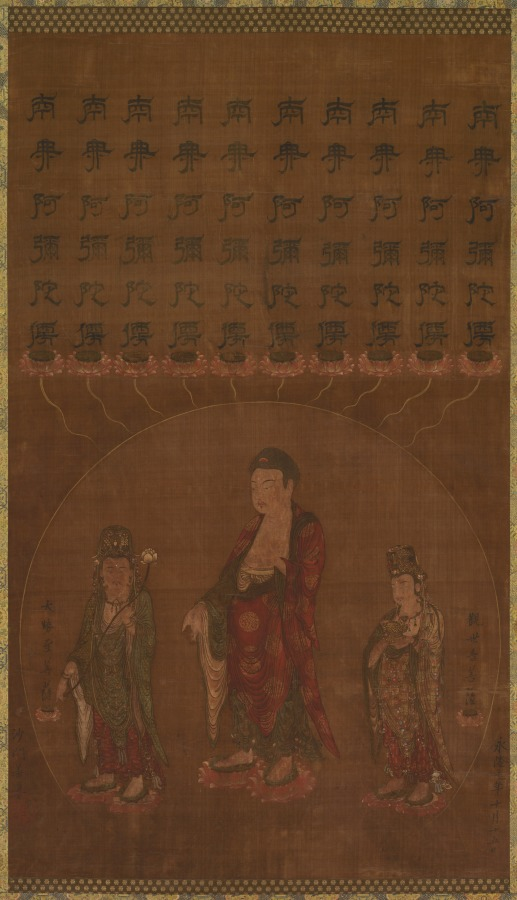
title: Buddha Amitābha with Two Attending Bodhisattvas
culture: China, Southern Song dynasty (1127-1279)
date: 1200s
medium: Hanging scroll; ink and color on silk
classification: Painting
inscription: 南無阿彌陀佛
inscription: 沙門善導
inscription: 觀世音菩薩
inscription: 大勢至菩薩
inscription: 永隆元年十月十五日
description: The supreme deities that rule over the Western Paradise—Amitābha (阿彌陀 in Chinese), Avalokiteśvara (Guanyin 觀音), and Mahāsthāmaprāpta (Dashizhi 大勢至)—are here enclosed within a circle of light. To secure entry into that paradise for Buddhist followers of the Pure Land sect, one must recite the phrase namo amituofo (南無阿彌陀佛, Homage to the Buddha Amitābha). Here the phrase is repeated 10 times in calligraphy above the figures, reinforcing the need for continual recitation.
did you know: Each line of calligraphy, which invokes the Buddha's name, emerges from a lotus blossom.